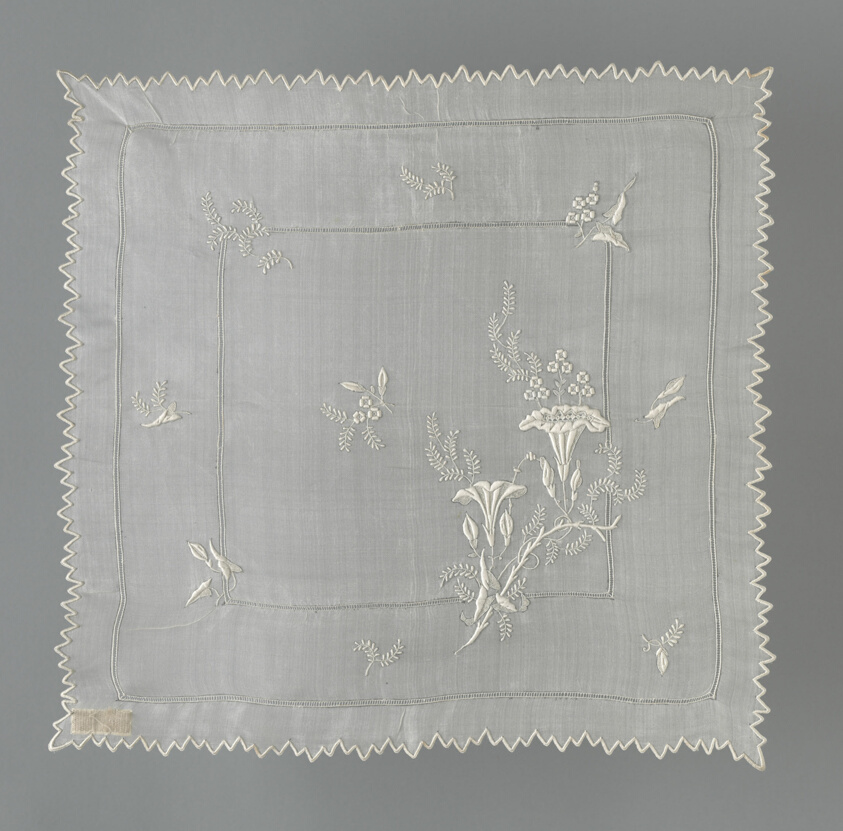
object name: Textile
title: Handkerchief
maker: France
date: c. 1870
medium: Silk, plain weave; embroidered with cotton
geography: France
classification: textile; needlework (visual works); costume accessory; weaving